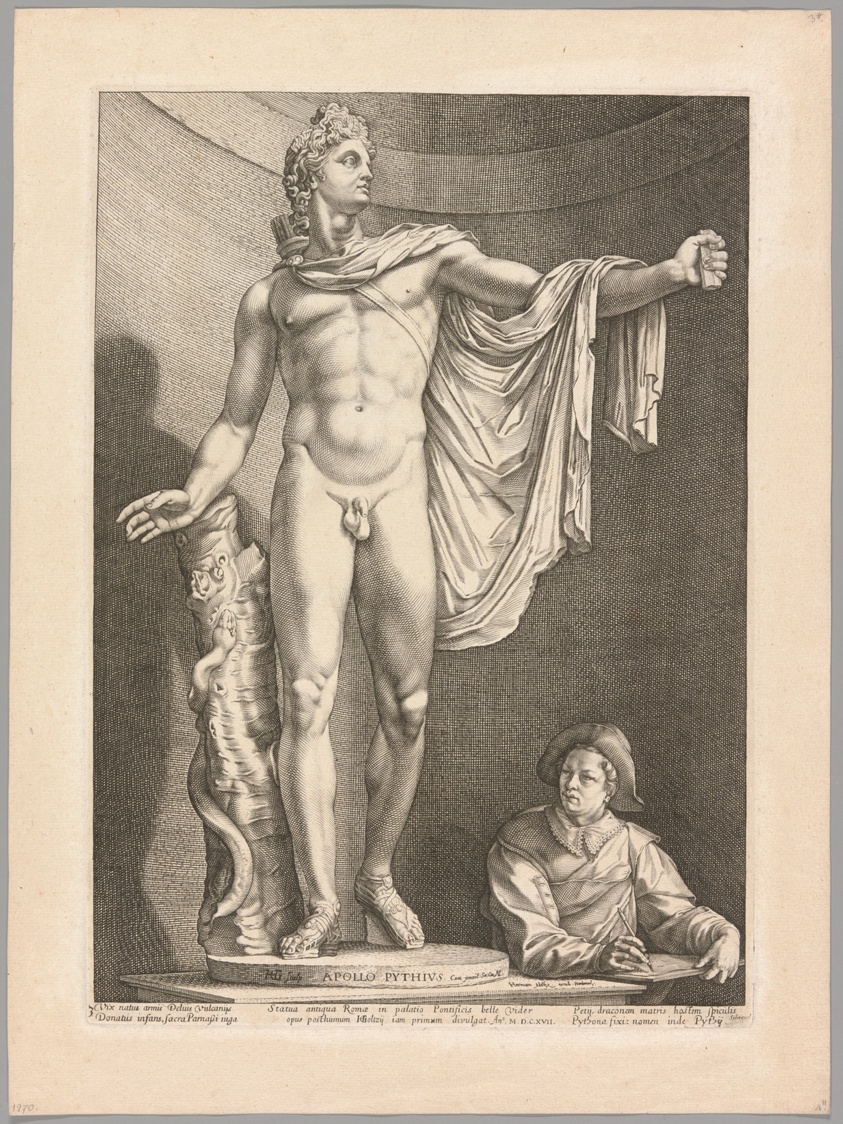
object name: Print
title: The Apollo Belvedere, plate 3 from Three Famous Antique Sculptures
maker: Hendrick Goltzius (Dutch, 1558-1617); text written by Theodorus Schrevelius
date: c. 1592, printed c. 1617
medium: Engraving in black on cream laid paper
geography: Netherlands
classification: engraving; print; prints and drawing